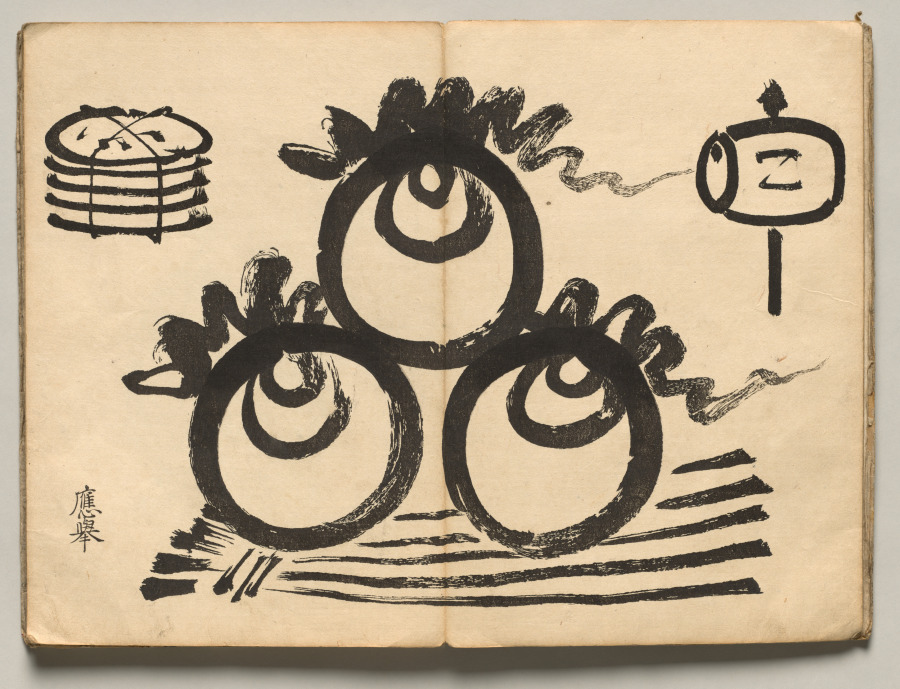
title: Flaming Jewels from Ōkyo Picture Book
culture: Japan, Edo period (1615–1868)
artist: after Maruyama Ōkyo (Japanese, 1733–1795)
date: 1850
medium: accordion-style woodblock printed folding-book; ink and color on paper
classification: Bound Volume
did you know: This impression of a book of woodblock-printed designs is missing a spread that depicts a crane.